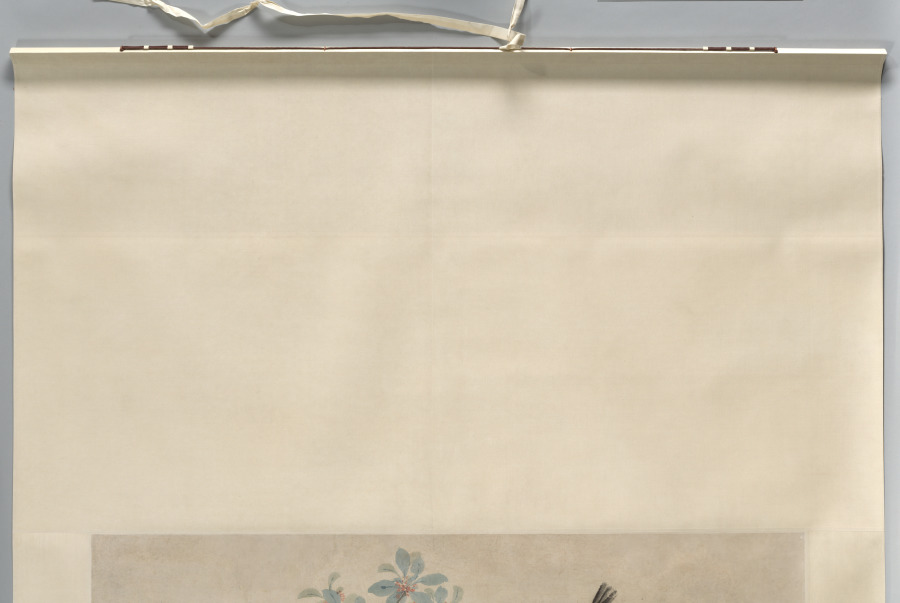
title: Yellow Chrysanthemums and Red Osmanthus in the Style of Wang Yuan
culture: China, Ming dynasty (1368–1644)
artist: Shen Zhou (Chinese, 1427–1509)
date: 1468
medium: hanging scroll, ink on paper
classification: Painting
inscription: Artist's inscription, signature, and 2 seals at upper right: Beneath the fence yellow [chrysanthemum] flowers brave the rain to blossom;/ Still others lean on the red osmanthus tree and dazzle the deep green moss./ With a goblet [of wine] I face them, entirely without concern;/ Who will answer the knocking at the gate where a guest has arrived? In the ninth month of the fourth year of the Chenghua era [1468], I followed the brush-conception of Wang Danxuan 王澹軒 [Wang Yuan 王淵] at the Youzhuzhuang 有竹庄 [House with Bamboo]. Inscribed and [painted] by Shen Zhou 沈周 of Changzhou 長洲. [seals] Shitian 石田; Shen shi Qinan 沈氏启南. trans. HR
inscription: 1 additional inscription, dated 1523, and 2 seals of Wang Chong 王寵 (1494-1533).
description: Shen Zhou, a native from Suzhou, was descended from a prominent land-owning family with strong ties to literati culture. Because Shen Zhou never entered government service, he had ample opportunity to cultivate the arts of painting, poetry, and calligraphy. Chrysanthemums and red osmanthus both bloom in autumn. The deep orange osmanthus flowers emanate a characteristically sweet fragrance. According to his inscription on the painting, Shen Zhou sought to imitate the style of the Yuan dynasty (1271–1368) painter Wang Yuan. His color-filled brushstrokes and washes, however, anticipate the flower painting style of Yun Shouping, whose Peonies are also in the Cleveland Museum of Art collection, https://www.clevelandart.org/art/1967.192. The sheer size and complex composition of this scroll are impressive.